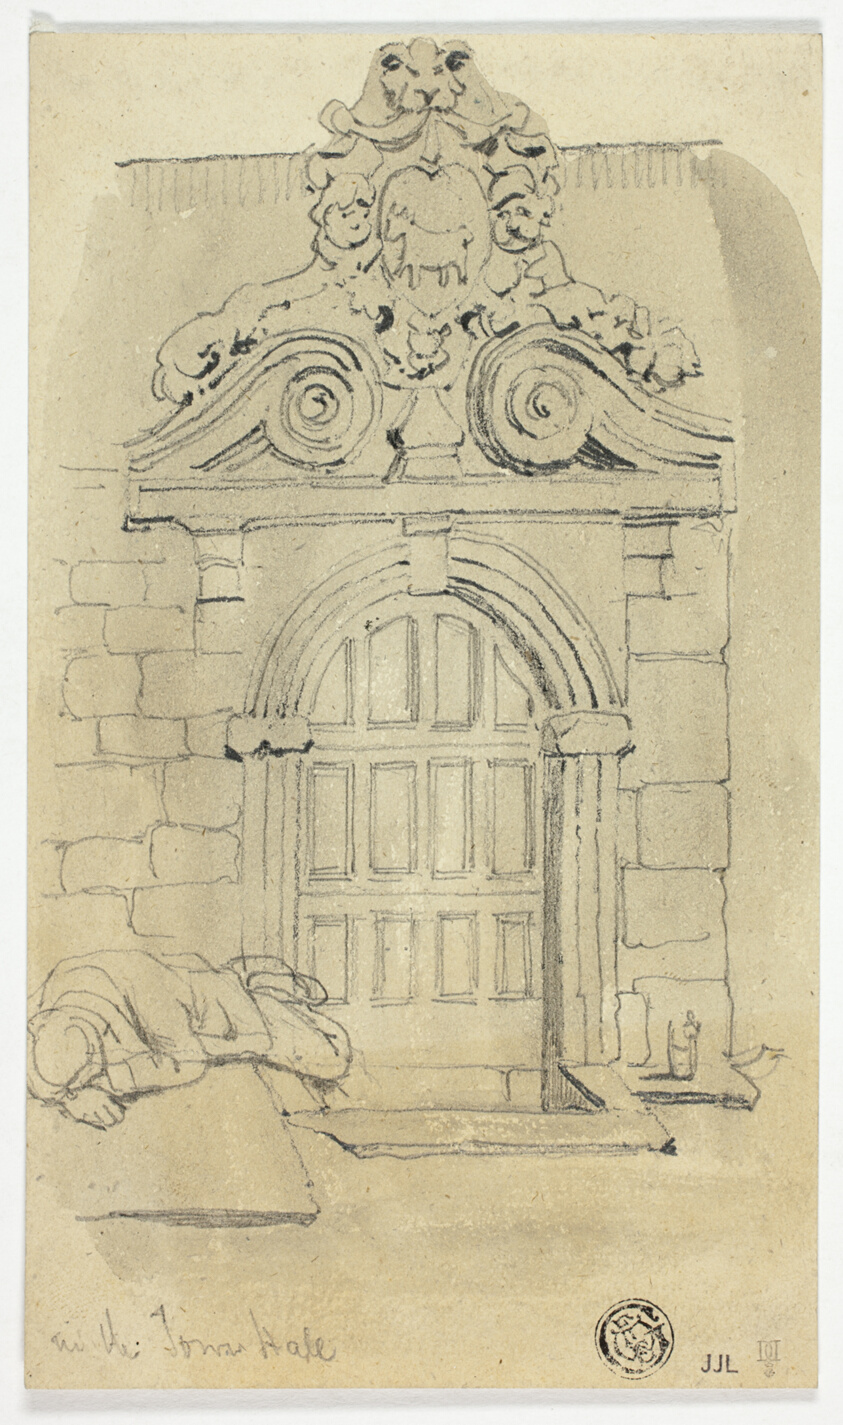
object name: Drawing and Watercolor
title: In the Town Hall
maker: Attributed to Daniel Maclise; Irish, 1806-1870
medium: Graphite, with brush and gray wash, on cream wove paper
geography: Ireland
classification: graphite; drawings (visual works); prints and drawing